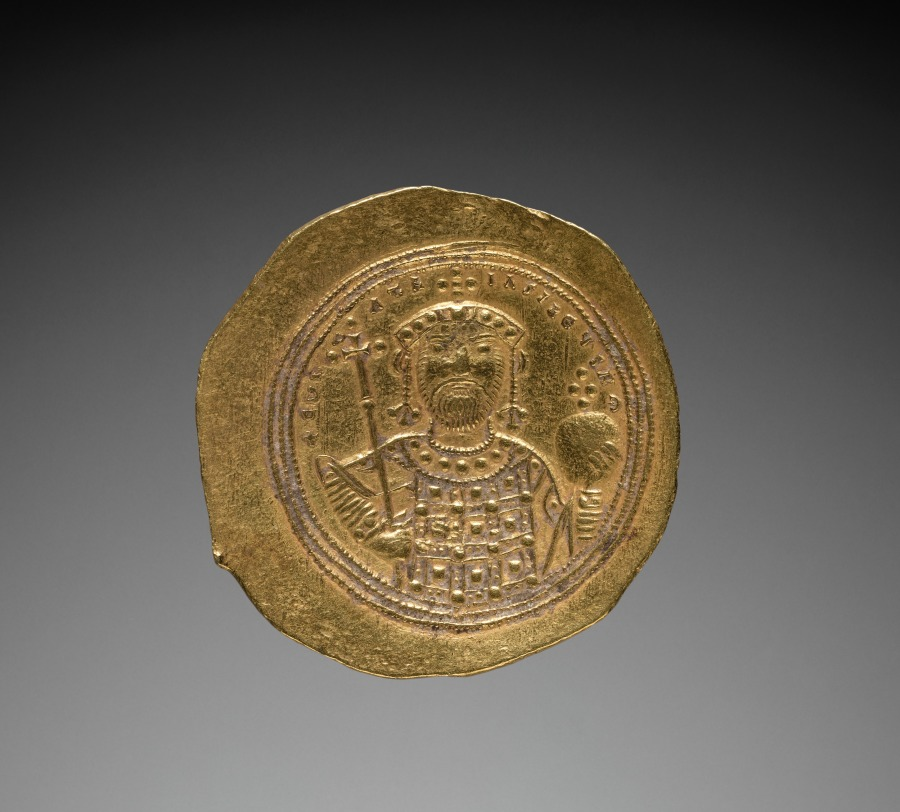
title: Nomisma with Constantine IX Monomachus (reverse)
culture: Byzantium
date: 1042–1055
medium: gold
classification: Coins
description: Byzantine Gold Coins The vast number of surviving Byzantine coins attests to the level of trade across the empire. Controlled and supervised by the emperor, the producers of coins took care to represent his authority and reflect his stature. Talented artists were recruited to engrave the dies (molds) used for the striking of coins. Emperors increasingly came to include their heirs and co-emperors on their coinage, as well as other family members or even earlier rulers. Coins were recognized, then as now, as small, portable works of art. With their inscriptions and images, Byzantine coins provide valuable documentation of historical events and a record of the physical appearance of the emperors. The coins shown here include the solidus, the basic gold coin of 24 karats; the tremissis, a gold coin of one-third the weight and value of the solidus; and the nomisma, which in the 10th century replaced the solidus as the standard gold coin.